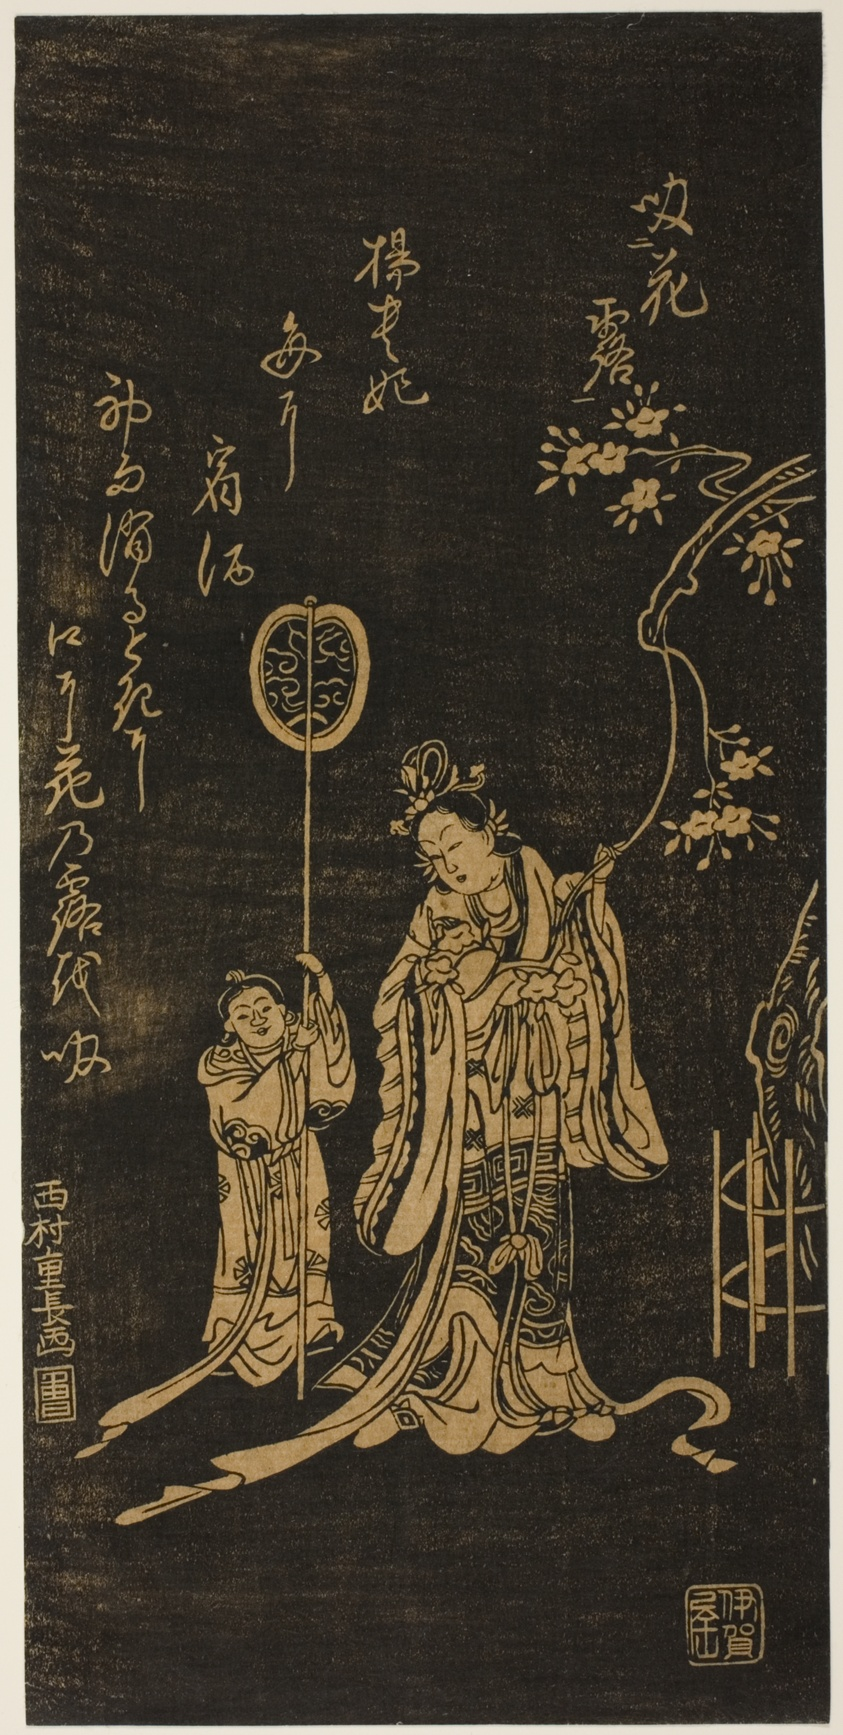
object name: Print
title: Yokihi (Chinese: Yang Guifei) with attendant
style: Japanese (culture or style)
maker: Nishimura Shigenaga (Japanese, 1697 (?)-1756)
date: 18th century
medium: Woodblock print; hosoban, sumizuri-e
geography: Japan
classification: woodblock print; print; asian art; woodblock